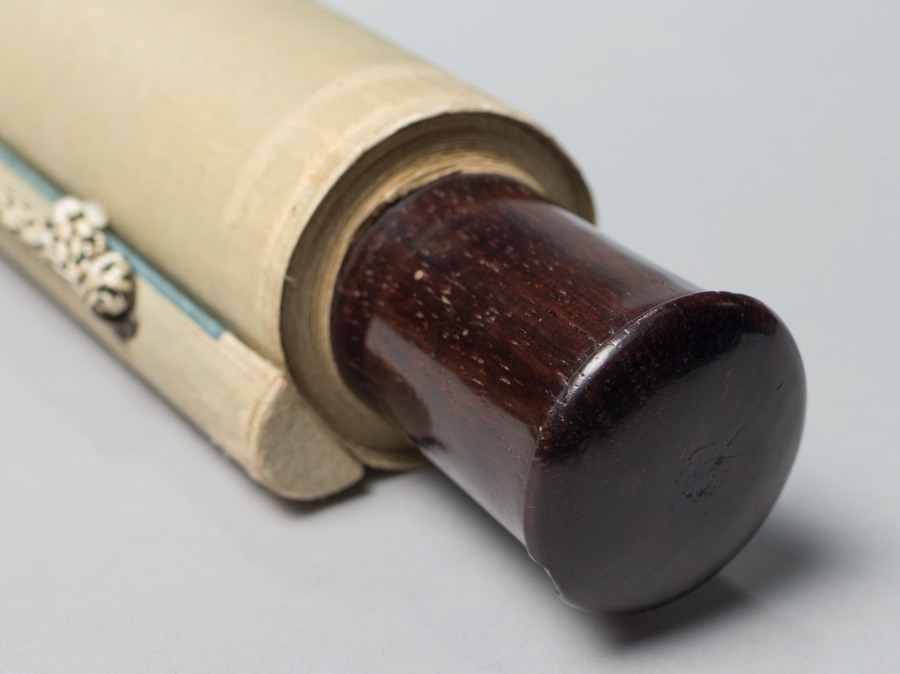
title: Looking for a Monastery in the Misty Mountains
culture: China, Ming dynasty (1368–1644)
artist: Chen Chun (Chinese, 1483–1544)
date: 1500–1544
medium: hanging scroll, ink on paper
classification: Painting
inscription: Artist's inscription, signature, and 2 seals: Row after row of misty trees envelop the Buddhist Monastery./ But the rustic who comes to find it will not lose his way./ Just across the wooden bridge, the dusty world is cut off;/ Among the countless falling petals, birds are singing confusedly. Daofu 道複 composed [this]. [seals] Fufu shi 復甫; Baiyang shanren 白陽山人. trans. WKH/LYSL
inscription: 3 additional unidentified seals.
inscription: 1 additional unidentified seal on the back of the mounting.